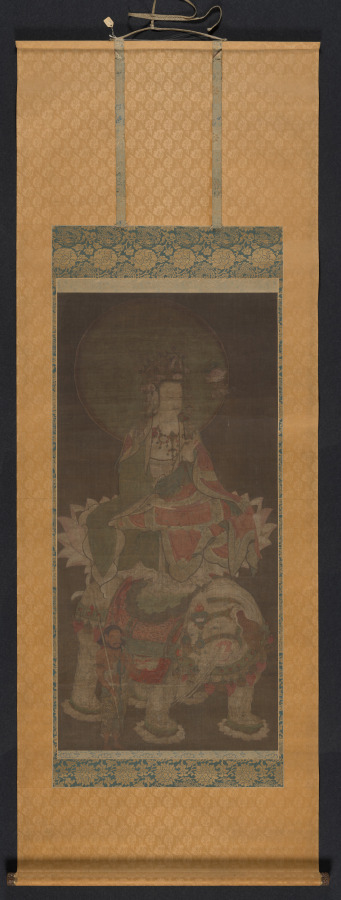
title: Samantabhadra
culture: China, Southern Song dynasty (1127-1279)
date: 1100s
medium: hanging scroll; ink and color on silk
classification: Painting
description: In the last chapter of the Lotus Sutra, one of the principal Buddhist texts, the great Bodhisattva Samantabhadra is described advancing to earth, riding on a six-tusked elephant, and proclaiming himself protector of the faithful. More frequently, he is shown with Bodhisattva Manjusri as the attendants of Shakyamuni (the historical Buddha). This scroll is probably the left panel in a triptych (group of three paintings) portraying these deities.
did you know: Samantabhadra holds a lotus with a sutra on top of the blossom.